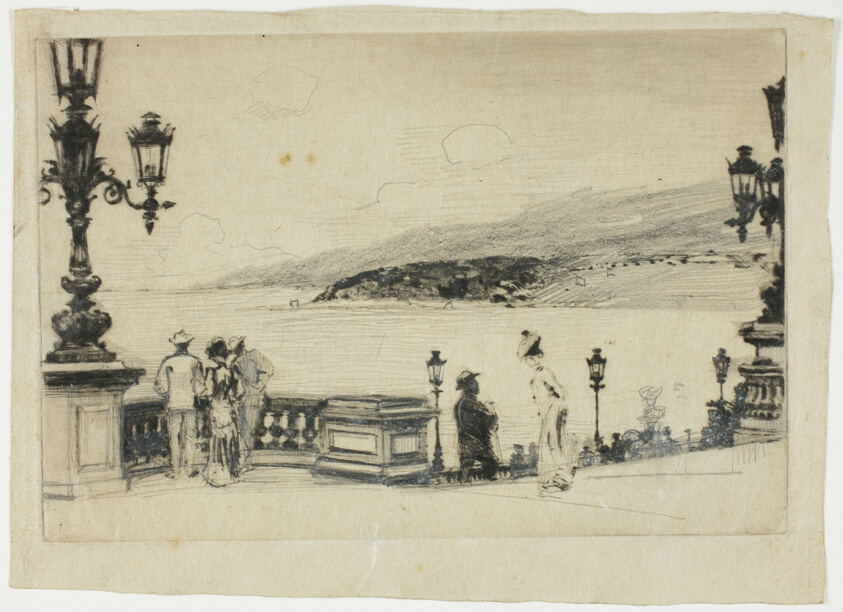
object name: Print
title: Study for The Terrace, Monte Carlo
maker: Theodore Roussel (French, worked in England, 1847-1926)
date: 1905–06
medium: Graphite over drypoint in black on tan Japanese paper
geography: England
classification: graphite; print; prints and drawing